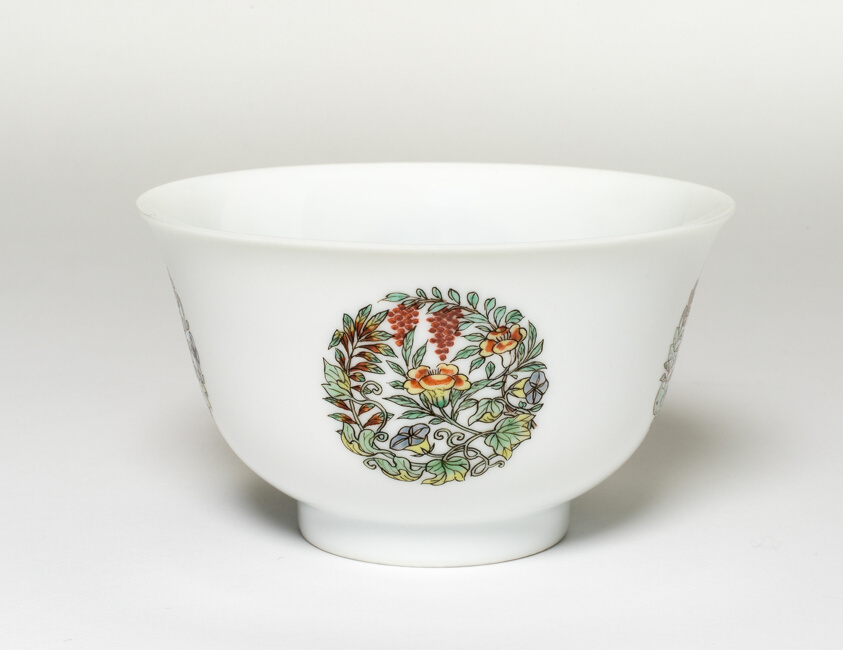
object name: Vessel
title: White-Glazed Bowl with Later Added Enamels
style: Chinese (culture or style)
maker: China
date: Qing dynasty (1644–1911), late Kangxi period (1662–1722), early 18th c.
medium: Porcelain painted in overglaze enamels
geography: China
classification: drinking vessel; porcelain; asian art; ceramics; vessel